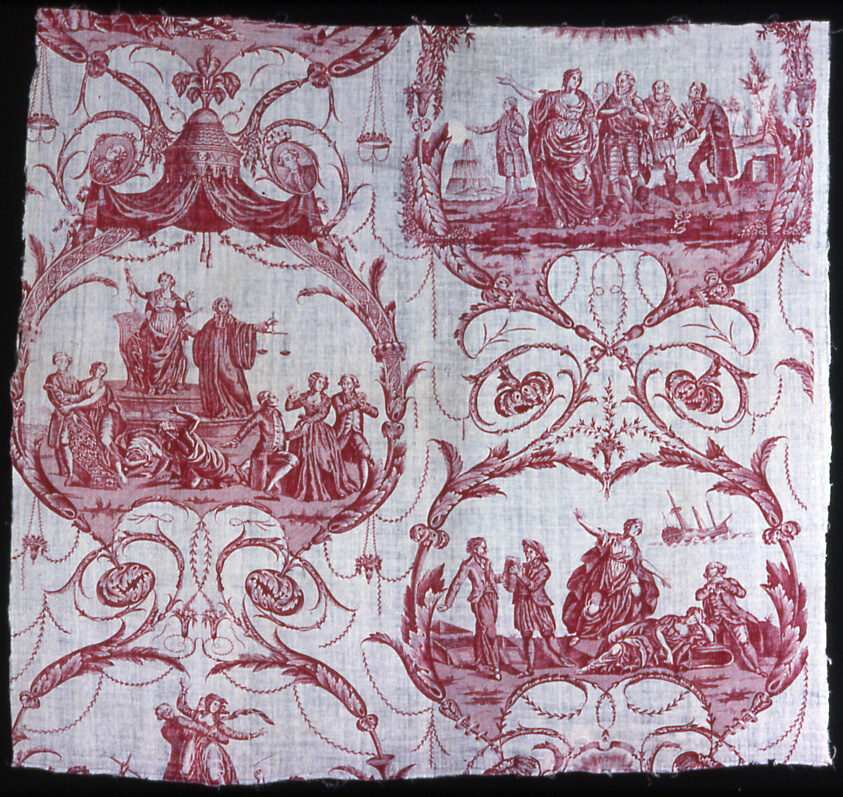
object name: Textile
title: Triomphe de Voltaire (Triumph of Voltaire) (Furnishing Fabric)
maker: Manufactured by Petitpierre et Cie. (French, 1760-1791); France, Nantes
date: 1788/93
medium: Cotton, plain weave, copperplate printed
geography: Nantes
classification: textile; weaving - printed; furnishing textile